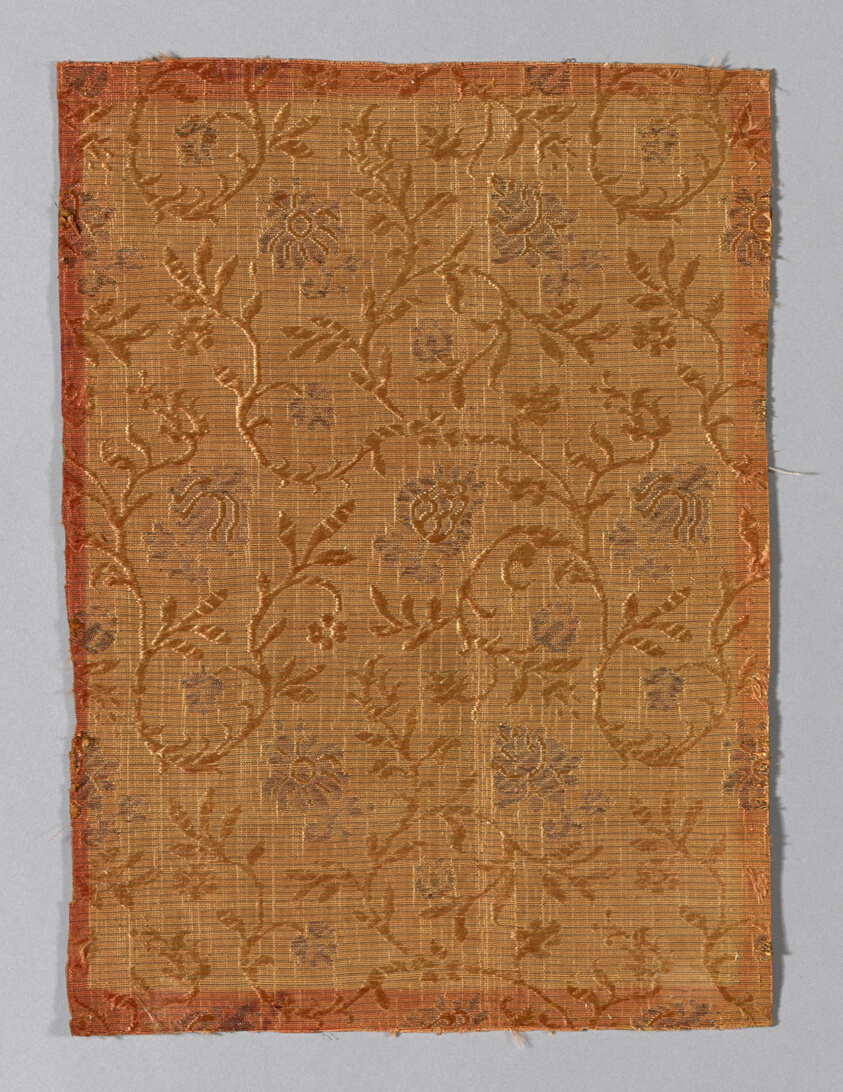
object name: Textile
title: Fragment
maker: Italy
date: 1650/1700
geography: Italy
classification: textile; weaving